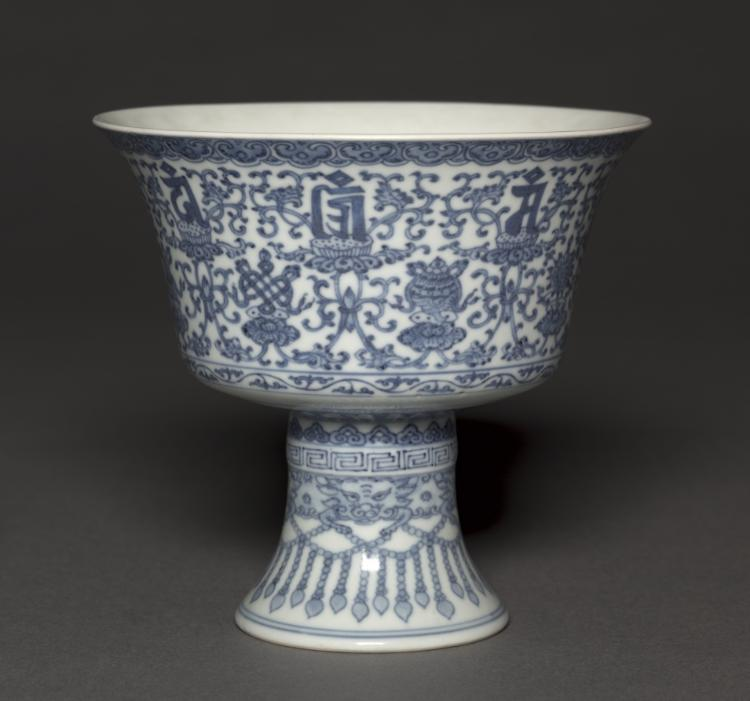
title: Stem Cup with Tibetan Characters and Buddhist Symbols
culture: China, Qing dynasty (1644-1911), Qianlong mark and reign (1736-95)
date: 1736–95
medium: porcelain with underglaze blue decoration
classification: Ceramic